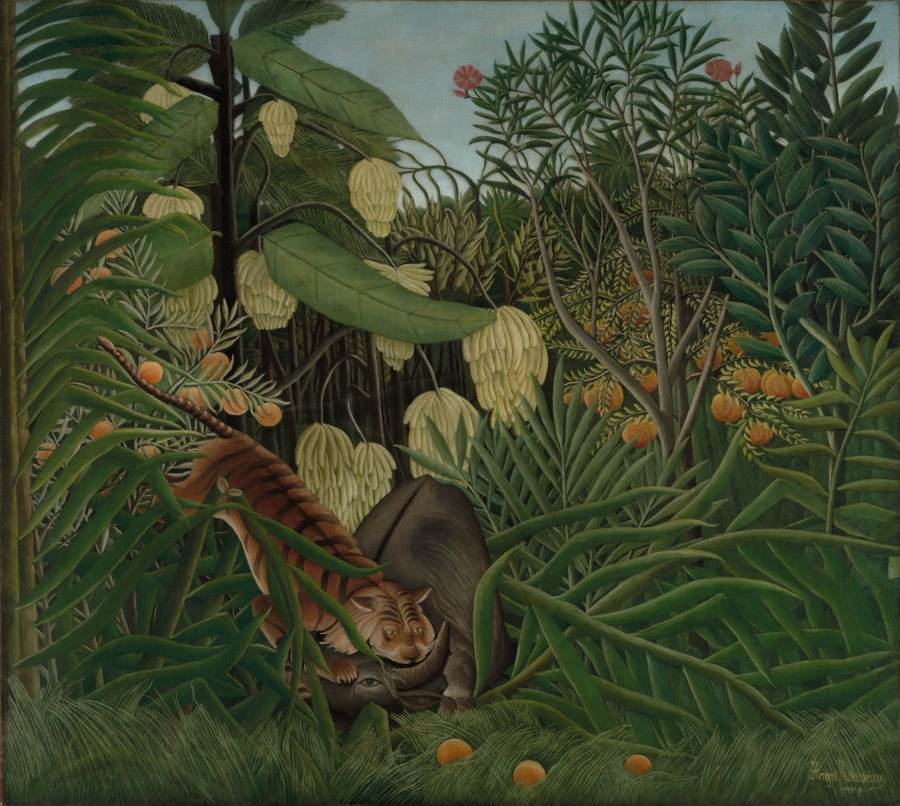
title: Fight Between a Tiger and a Buffalo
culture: France, late 19th-early 20th Century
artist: Henri Rousseau (French, 1844–1910)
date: 1908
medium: oil on fabric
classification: Painting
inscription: Signed and dated lower right: Henri Rousseau / 1908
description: Having never ventured outside France, Henri Rousseau derived his jungle scenes from reading travel books and visiting the Paris botanical garden. He placed this imaginary scene of a tiger attacking a buffalo within a fantastic jungle environment in which botanical accuracy was of little importance (note the bananas growing upside down). Here, sharply outlined hothouse plants are enlarged to fearsome proportions. Rousseau was working on this painting while imprisoned for fraud in December 1907. Officials granted him an early release to finish it for exhibition at the Salon des Indépendants, where this major composition, one of the artist's largest and most important, appeared in March 1908. A self-taught artist and retired customs inspector, Rousseau was admired by Pablo Picasso and other avant-garde artists for his originality and the naïve purity of his vision.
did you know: Many of Henri Rousseau's paintings depict wild animals and tropical jungles that might lead one to believe he traveled widely. However, Rousseau never left France, but drew inspiration from visiting botanical gardens and reading travel books.